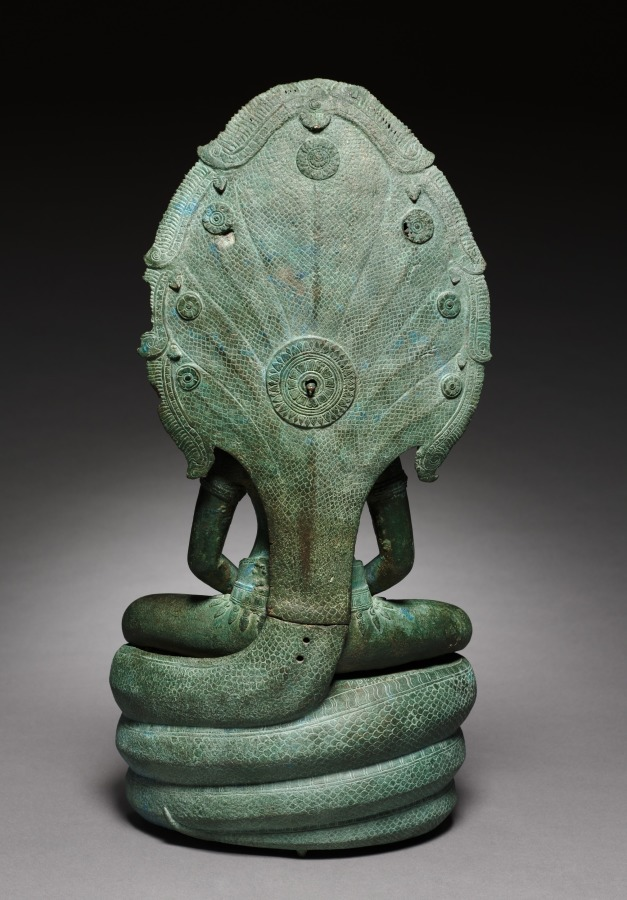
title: Naga-Enthroned Buddha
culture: Cambodia, Angkor, Angkor Wat Period, 12th century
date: 1100s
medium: bronze with traces of gilding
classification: Sculpture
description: Jayavarman VII, who built the great royal temple at Banteay Chhmar, linked himself with the image of the Buddha seated on a serpent, or naga, as the divine form under which he would be honored. During his reign, the naga-enthroned Buddha became a ubiquitous image for veneration, often set up together with Lokeshvara, who was associated with his father, and Prajnaparamita, the form under which his deceased mother was honored. Lokeshvara is the powerful enlightened being of compassion, while Prajnaparmita is the goddess who personifies wisdom. King Jayavarman VII, therefore, presented himself as the enlightened Buddha, the product of the union of Compassion and Wisdom, supported and glorified by the naga, which refers to the Khmer people. Images of the naga-enthroned Buddha have been found at Banteay Chhmar, both in architectural relief sculpture and as icons in the round. After the death of Jayavarman VII, followers of other forms of Buddhism (for example, Theravada) that became prevalent in Cambodia changed the meaning of the naga-enthroned Buddha and reinterpreted the image to refer to a scene from the historical Buddha’s life story in which a serpent protected him from a flood. The crowned and bejeweled aspect of this Buddha, though, indicates that it is another kind of transcendent figure. In his lap his hands are in a posture of meditation, holding what appears to be an offering of ceremonial rice referring to the hope that he will ensure the prosperity of the land.